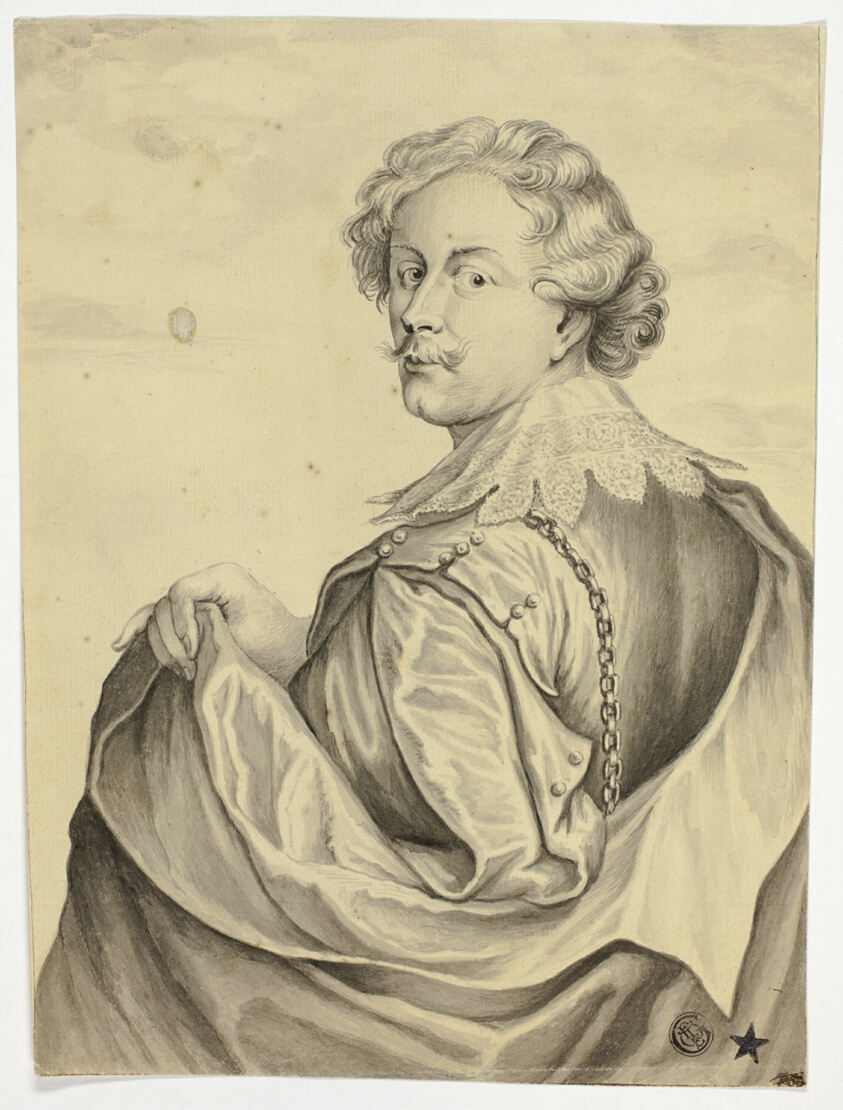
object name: Drawing and Watercolor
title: Anthony van Dyck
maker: After Anthony van Dyck; Flemish, 1599-1641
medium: Pen and black ink, with brush and gray wash, on cream laid paper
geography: Flanders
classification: ink or chalk wash; drawings (visual works); prints and drawing